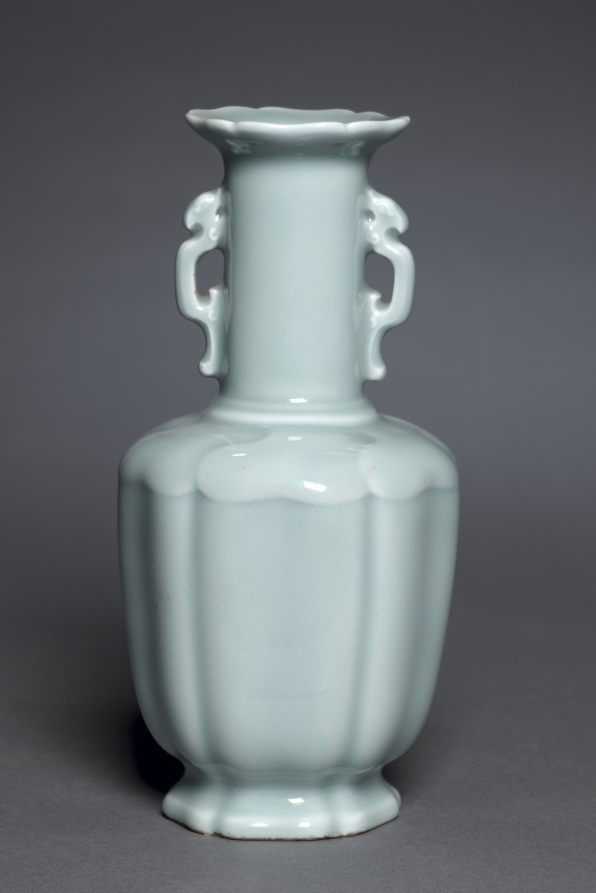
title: Vase with Dragon Handles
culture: China, Qing dynasty (1644–1911), Qianlong reign (1736–95)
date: 1736–95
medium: porcelain with celadon glaze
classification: Ceramic